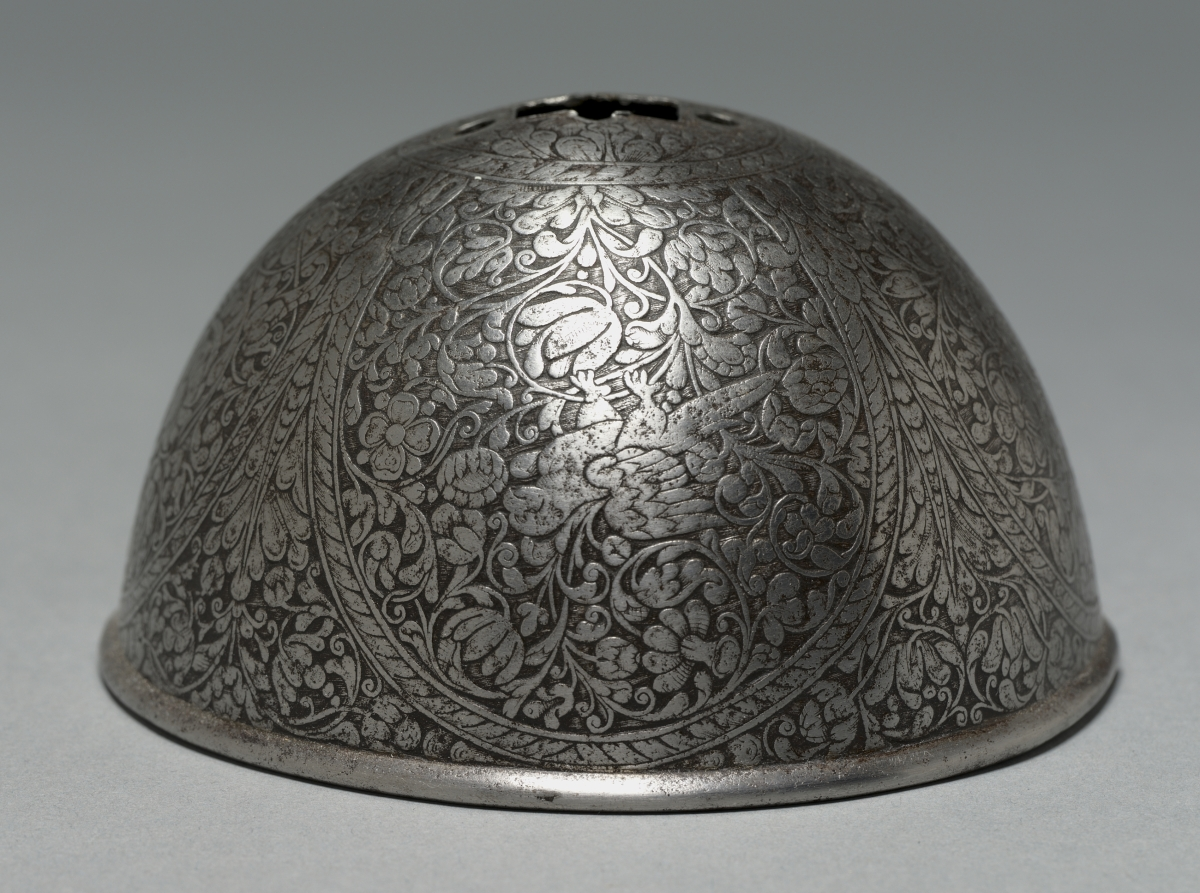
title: Cup from a Rapier's Hilt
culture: Italy, 17th century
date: c. 1650–75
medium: steel with etched floral, floiate, and bird designs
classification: Arms and Armor